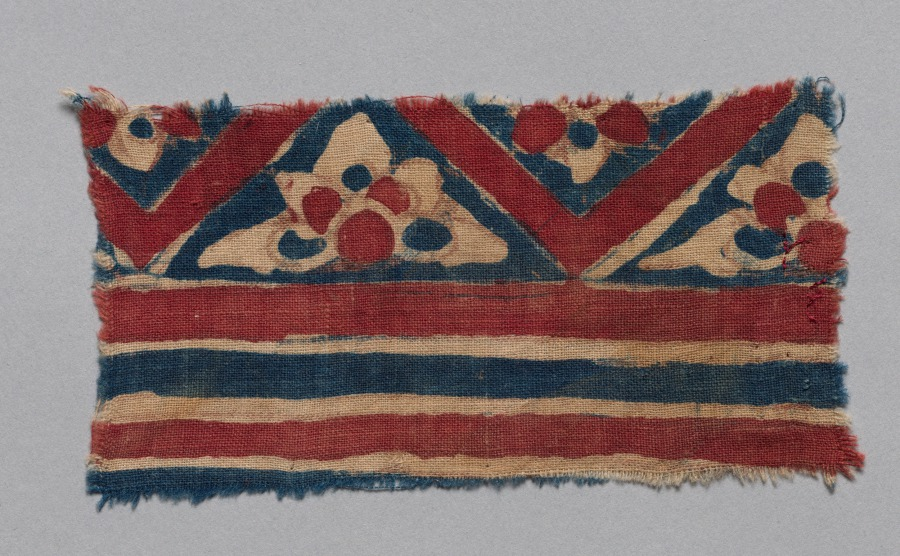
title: Fragment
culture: India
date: 1100s–1300s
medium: plain cloth, hand painted; cotton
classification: Textile